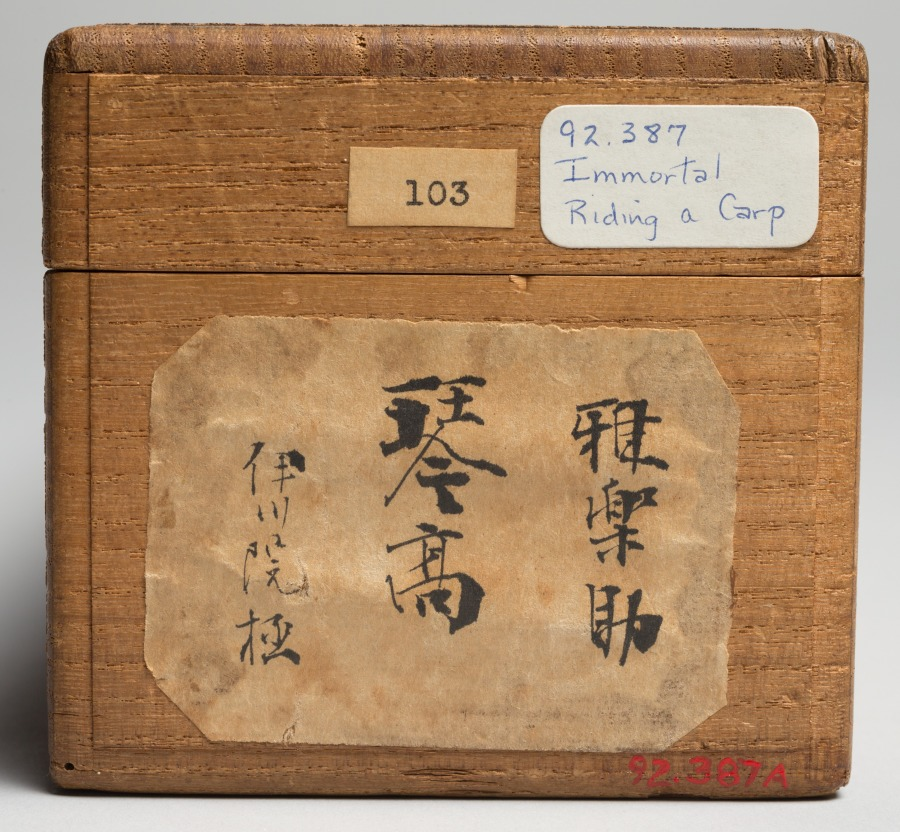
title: Immortal Riding on a Carp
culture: Japan, Edo period (1615–1868)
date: c. 1600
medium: hanging scroll; ink on paper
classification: Painting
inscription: seal of Motonobu ?